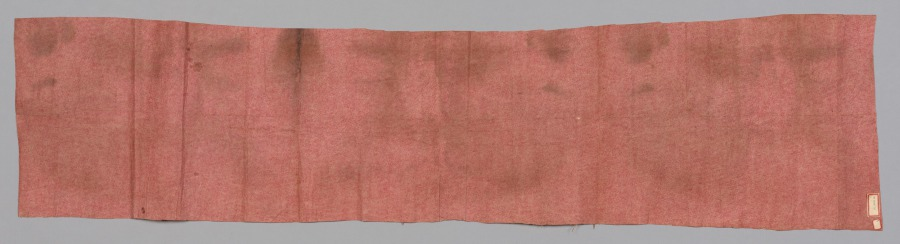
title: Tapa Cloth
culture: Oceania, Polynesia, Hawaii, 20th century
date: before 1930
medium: probably mulberry bark (Broussonetia papyrifera)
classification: Textile